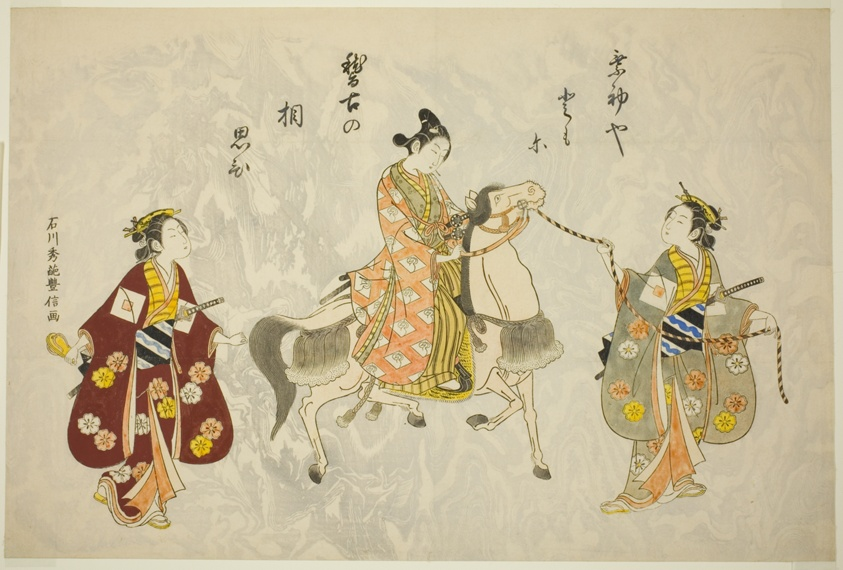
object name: Print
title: Young Man on a Horse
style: Japanese (culture or style)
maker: Ishikawa Toyonobu (Japanese, 1711-1785)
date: c. 1760s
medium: Color woodblock print; oban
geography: Japan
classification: print; asian art